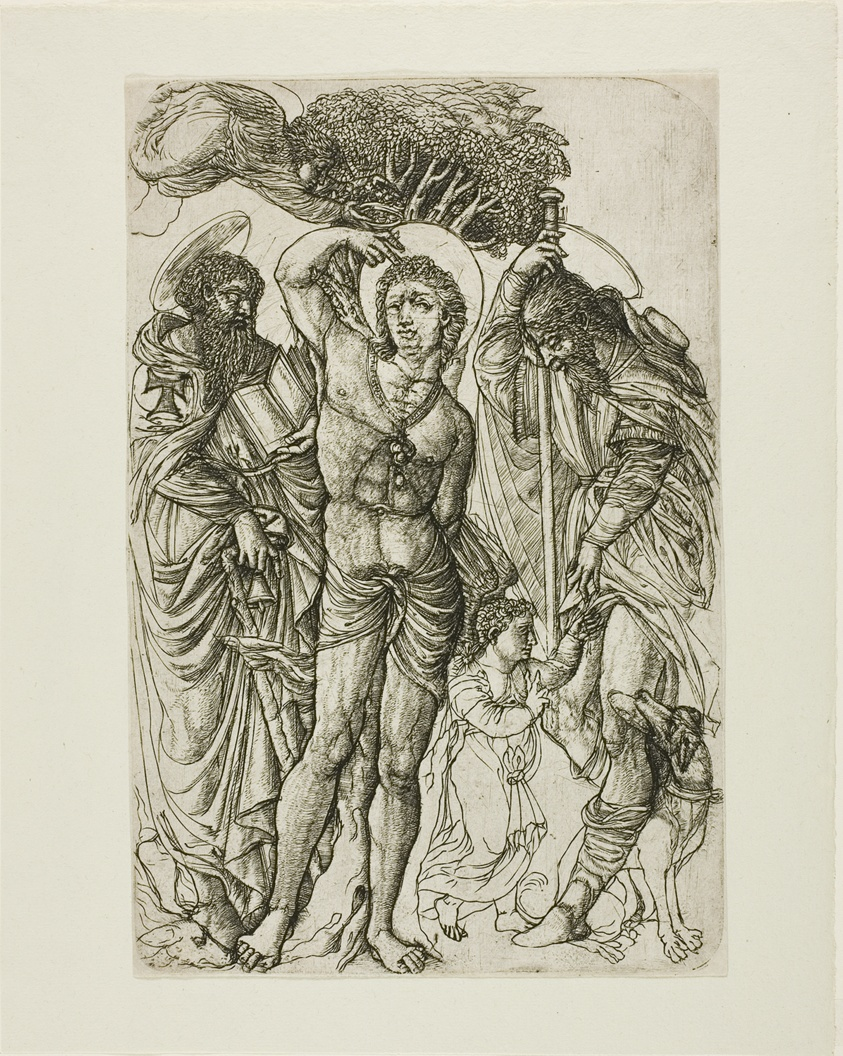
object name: Print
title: Saint Sebastian, Saint Anthony, and Saint Roch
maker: Jean Duvet (French, 1485-after 1561)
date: 1550/55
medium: Engraving in black on buff laid paper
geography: France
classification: engraving; print; prints and drawing